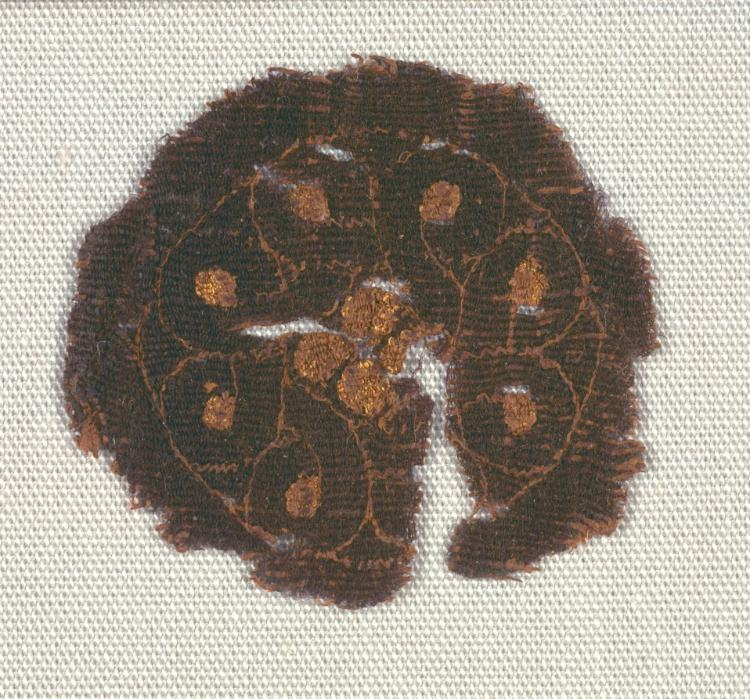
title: Round Segmentum from a Tunic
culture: Egypt, Byzantine period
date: 300s–400s CE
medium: tapestry (probably inwoven in tabby ground); wool, linen, and gold foil around silk core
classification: Textile